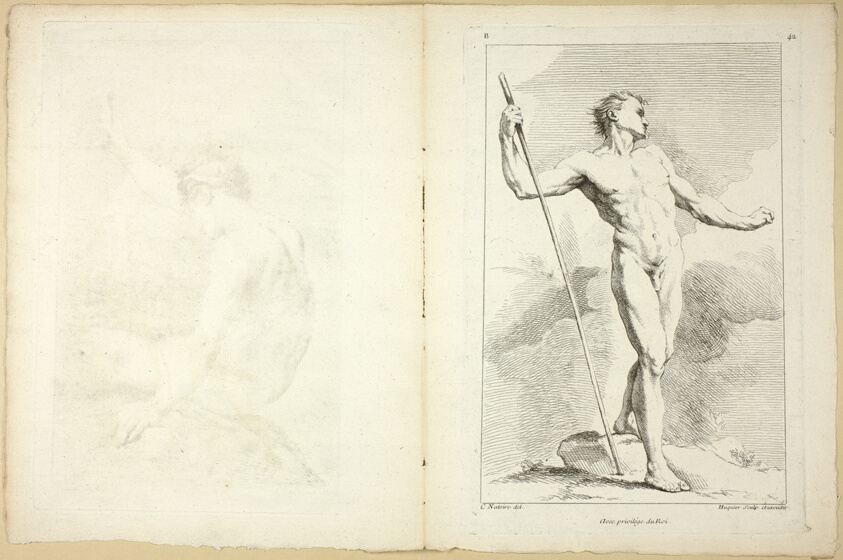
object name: Print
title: Page 42 and Page 43, from Seconde Livre de Figures d’Académies Gravées en Partie par les Professeurs de l’Académie Royale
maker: Gabriel Huquier (French, 1695-1772); after Charles-Joseph Natoire (French, 1700-1777); Pierre Aveline (French, 1702-1760); after Edme Bouchardon (French, 1698-1762); printed by Gabriel Huquier (French, 1695-1772); published by Charles-Antoine Jombert (French, 1712-1784)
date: published 1745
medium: Etching on ivory laid paper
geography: France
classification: etching; print; prints and drawing